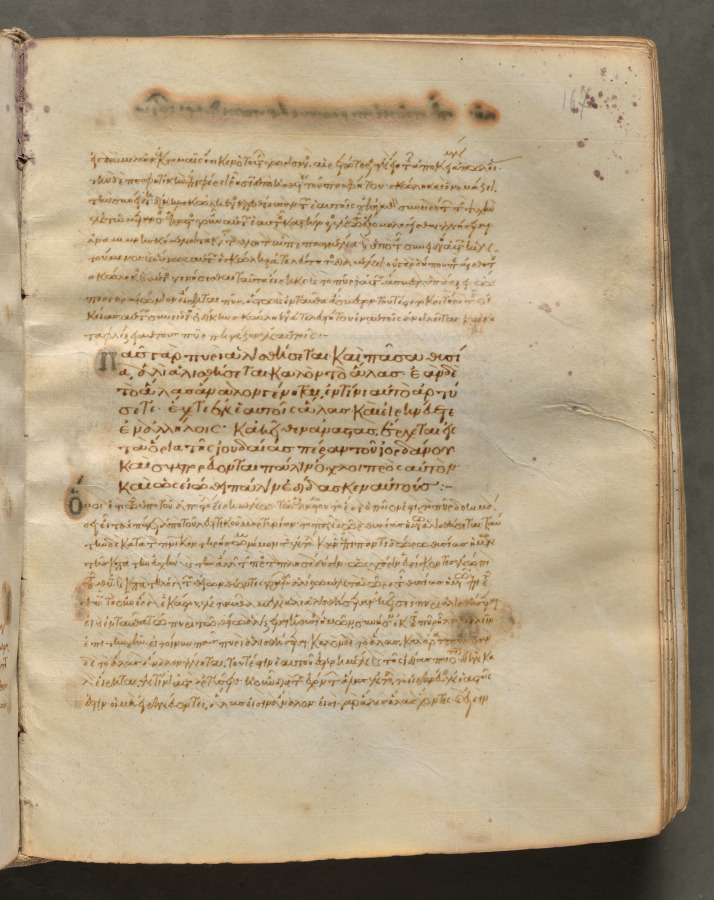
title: Text, folio 167 (recto), from a Gospel Book with Commentaries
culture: Byzantium, Constantinople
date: c. 1000–1100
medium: ink, tempera, and gold on vellum; leather binding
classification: Bound Volume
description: Each of the four gospels in this book opens on a page with brilliantly illuminated borders depicting the author of the text as well as birds-principally peacocks, symbols of the immortality of the soul-and fountains, representing the fountain of life and the salvation of the soul. This volume consists of 428 leaves with texts in Greek. Its level of sophistication suggests that it was probably written and decorated in a monastery in Constantinople.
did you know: Gospel Books were carried in procession through Byzantine churches.